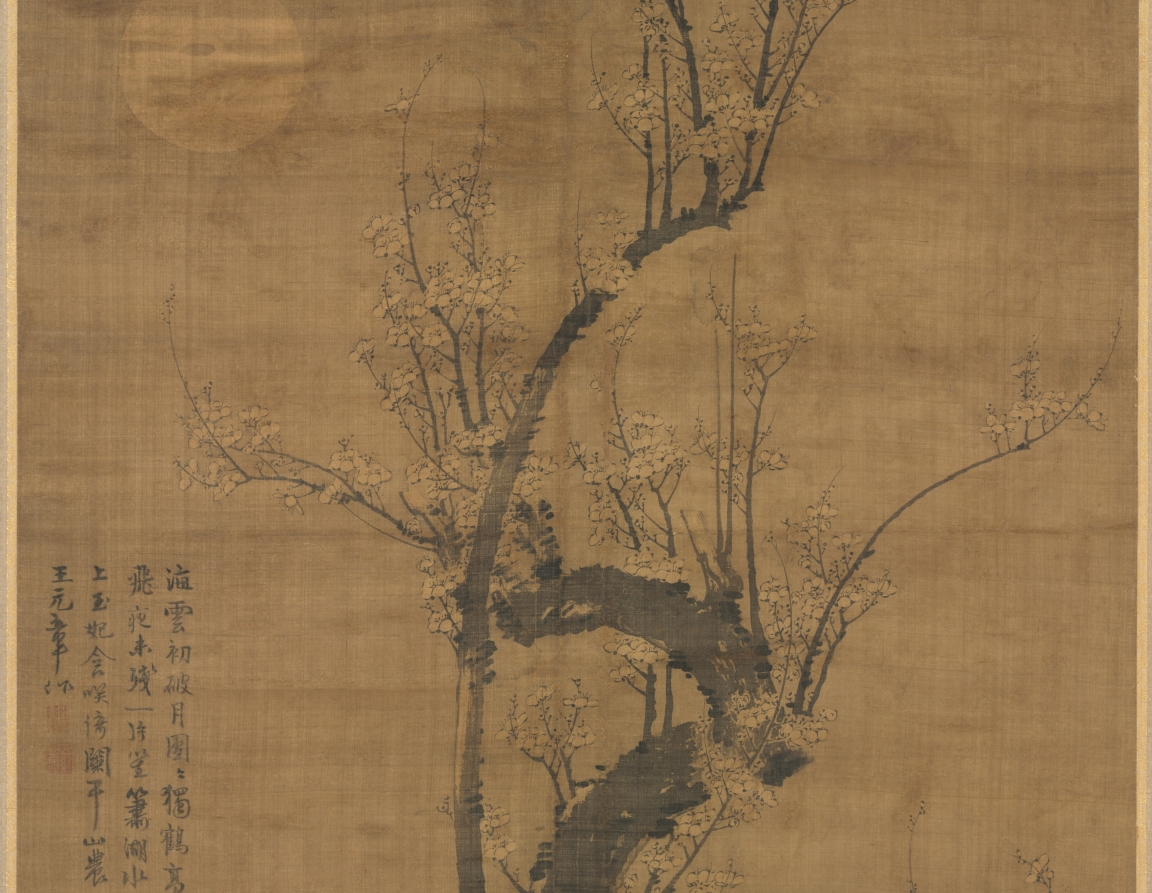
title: A Prunus in the Moonlight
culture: China, Yuan dynasty (1271-1368)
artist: Wang Mian (Chinese, 1287–1359)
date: 1300s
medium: Hanging scroll; ink on silk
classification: Painting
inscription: 8 additional seals: 6 of the Qianlong 乾隆 emperor (r. 1736-95); 2 of Dong Gao 董誥 (1740-1818).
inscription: 海雲初破月團團，獨鶴高飛夜未殘。/ 一片笙簫湖水上，玉妃含笑倚闌干。 王元章作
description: The plum flourishes in the mild climate of the south, and it was not before the Six Dynasties period (220– 589 CE) that the motif began to be appreciated by southern artists, many of whom had emigrated from the north. Wang Mian from Zhejiang province had failed the civil and military service examinations and later rejected appointments under the Mongol government. Instead, he chose to return home, making a living by selling plum paintings. Few of Wang’s works have survived, but they demonstrate that by his time the ink-plum (momei) genre was fully developed.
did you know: The painting portrays the plum in the nighttime, as indicated by the tint of the background and the presence of the moon.